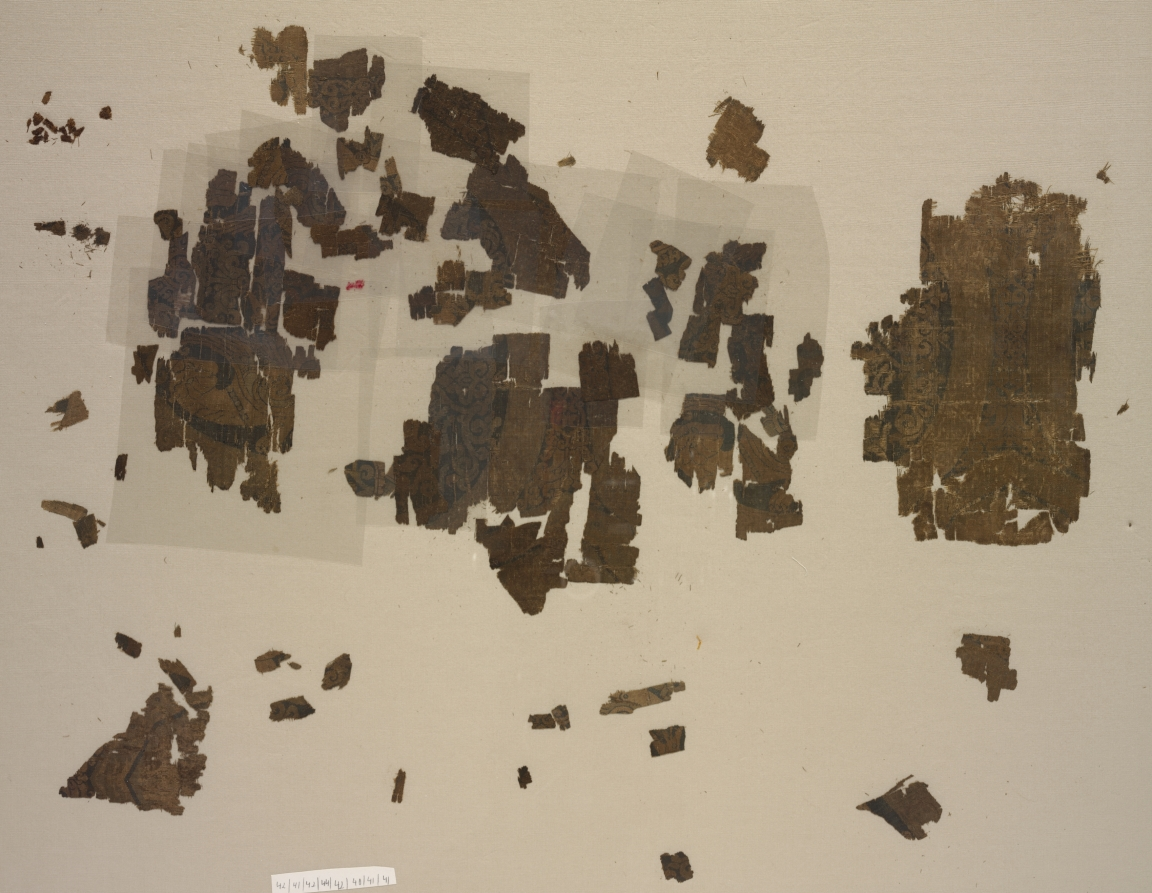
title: Fragments with winged lions in roundels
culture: Iran, Buyid or Seljuk period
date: 899–1160 (radiocarbon date, 95% probability)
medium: Silk: taqueté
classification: Textile